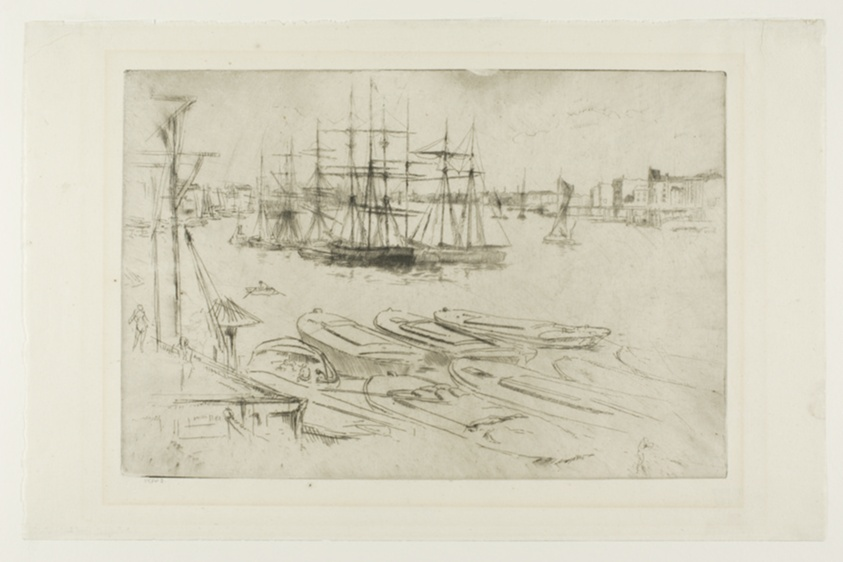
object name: Print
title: Wapping - The Pool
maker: James McNeill Whistler (American, 1834-1903)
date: 1878/79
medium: Etching and drypoint in black ink on ivory laid paper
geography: United States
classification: etching; drypoint; print; prints and drawing; paper